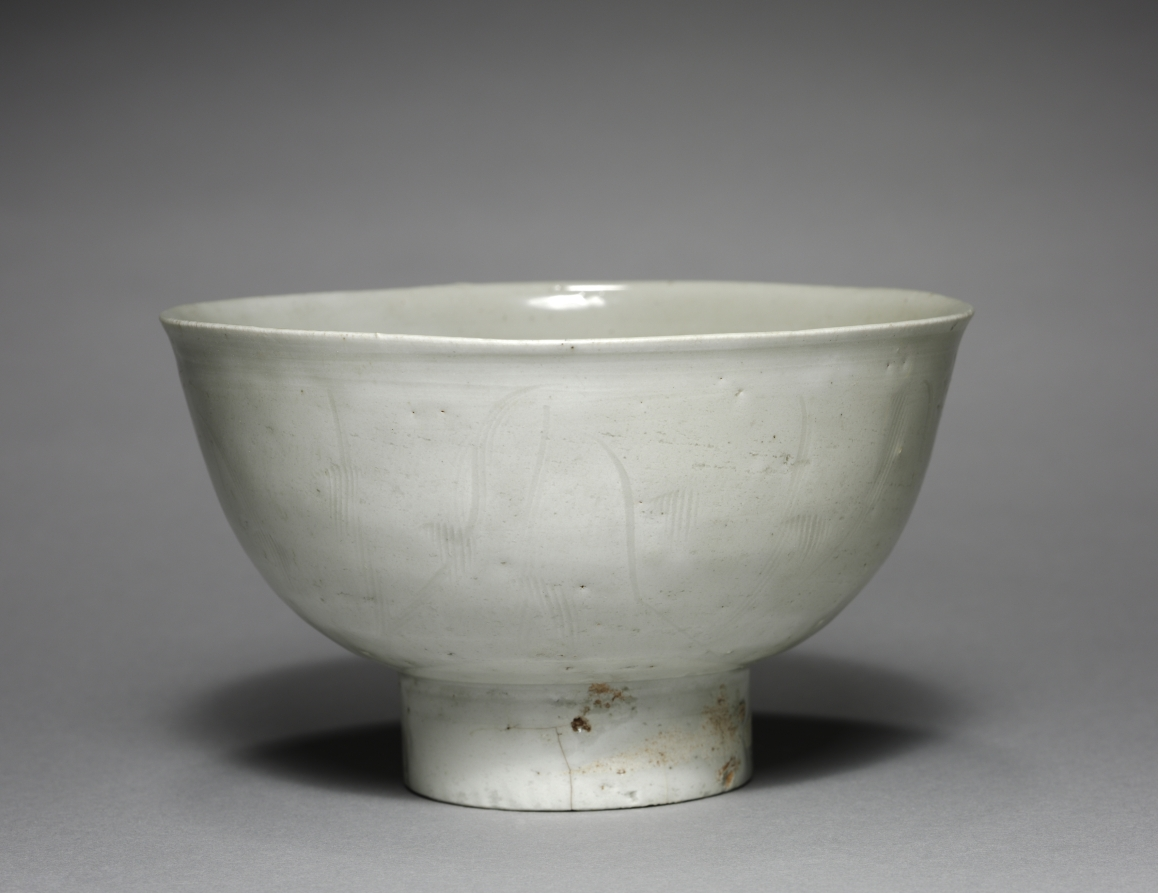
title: Bowl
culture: Korea, Goryeo dynasty (918–1392)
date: 1300s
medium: pottery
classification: Ceramic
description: While this cup was donated as a rare white celadon example excavated from a Goryeo period tomb, it turns out to be an imported Song period Chinese example. This suggests that many Korean elites during the Goryeo dynasty (918–1392) enjoyed various imported luxury from China known for its advanced ceramic production.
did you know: While this cup was donated as a rare white celadon example excavated from a Goryeo period tomb, it turns out to be an imported Song period Chinese example.